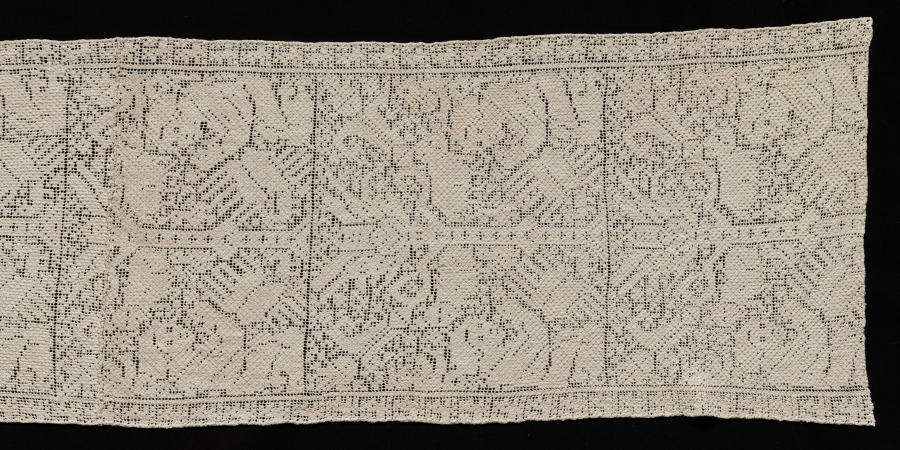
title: Panel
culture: Spain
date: 1800s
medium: Linen: needle lace, filet/lacis (knotted ground and darned in two directions)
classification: Lace